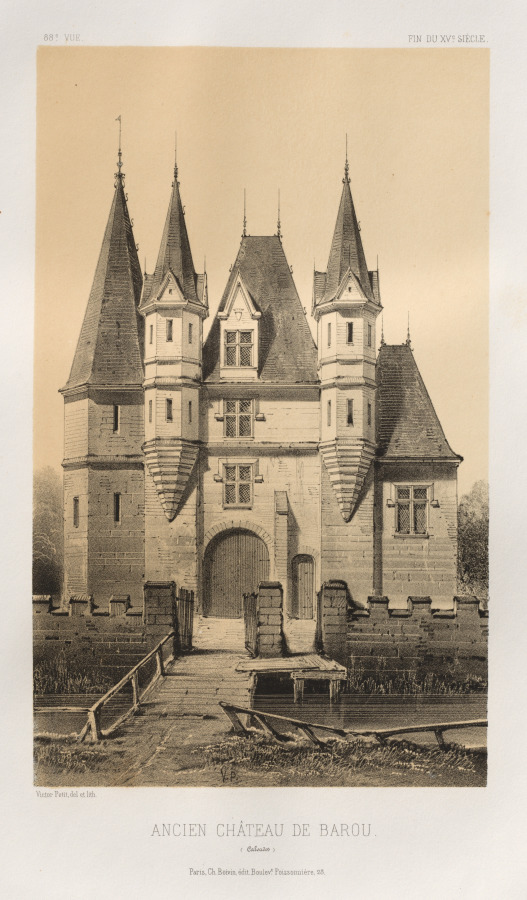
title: Architecture Pittoresque ou Monuments des XVeme. Et XVIeme. Siecles: Chateaux de France des XV et XVI Siecles: Pl. 88, Ancien Château de Barou (Calvados)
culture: France, 19th century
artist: Victor Petit (French, 1817–1874)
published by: Charles Boivin (publisher and editor); Lith de Godard a Paris (printer)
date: 1860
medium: lithograph with tint stone, from portfolio of 100 lithographs with tint stone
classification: Print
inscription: Engraved in plate, above image, upper left: 88e. VUE.; engraved in plate, above image, right: FIN DU Xve. SIÈCLE.; engraved in plate, below image, lower left: Victor Petit, del et lith.; engraved in plate, below image, center: ANCIEN CHÂTEAU DE BAROU. / (Calvados) / Paris, Ch. Boivin, édit.Boulevt. Poissonnière, 23.